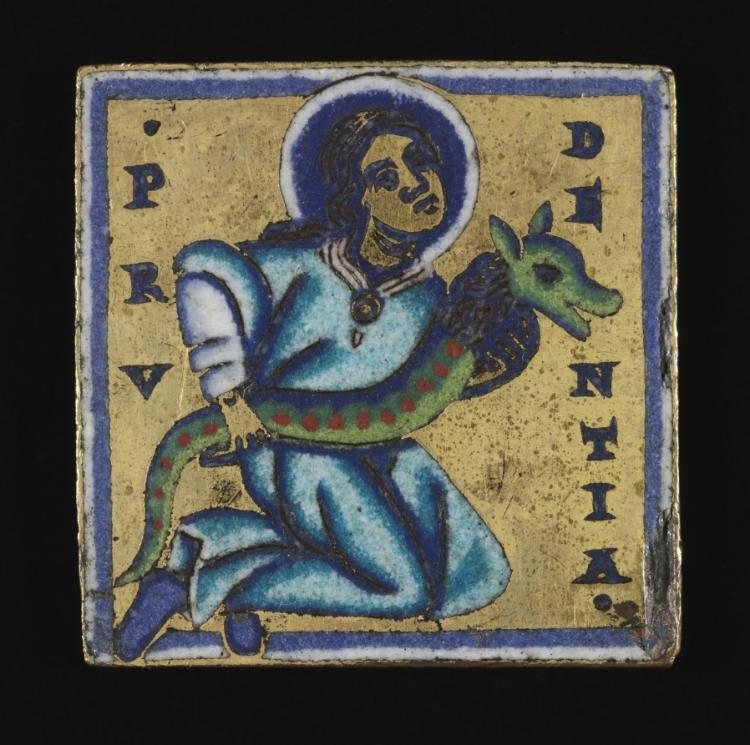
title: Plaque: Prudentia (Prudence)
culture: Mosan, Valley of the Meuse, Gothic period, 12th century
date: c. 1160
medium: gilded copper, champlevé enamel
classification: Enamel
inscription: on front, in gilt lettering: Prudentia.